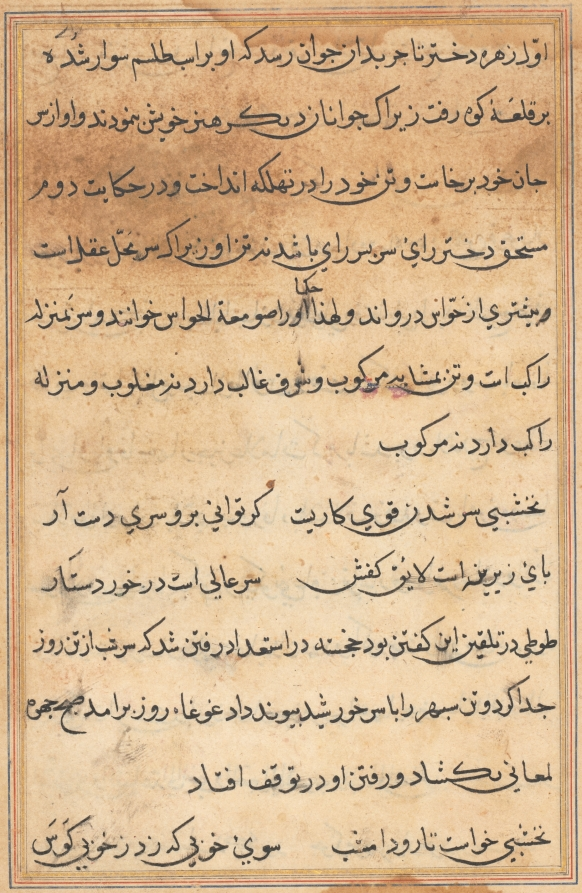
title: Page from Tales of a Parrot (Tuti-nama): text page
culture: Mughal India, court of Akbar (reigned 1556–1605)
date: c. 1560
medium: gum tempera, ink, and gold on paper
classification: Painting